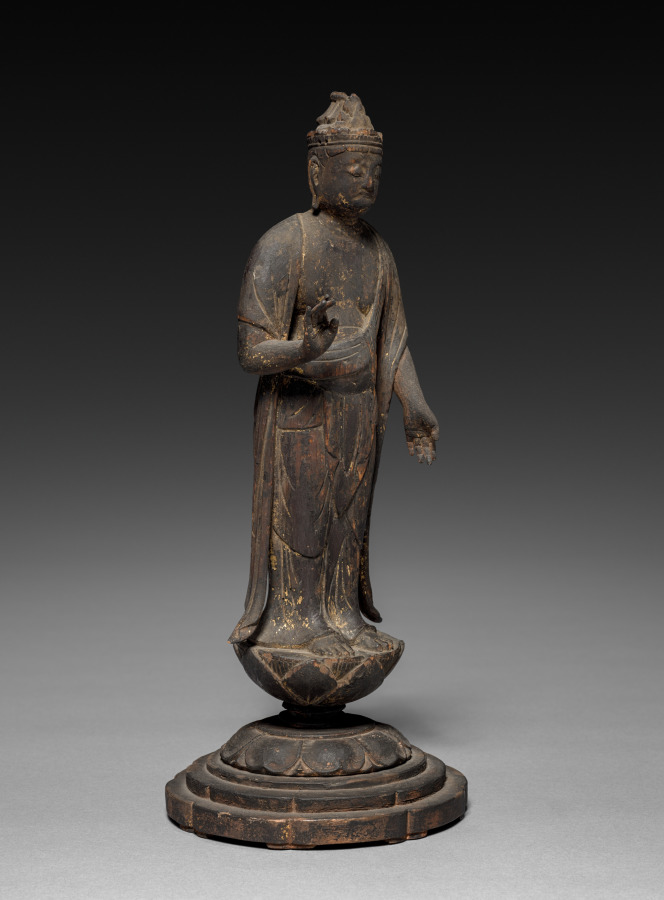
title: Kannon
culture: Japan, Heian period (794–1185) or Edo period (1615–1868)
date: 1000s or c. 1800–1868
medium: Wood with traces of lacquer and gilding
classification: Sculpture